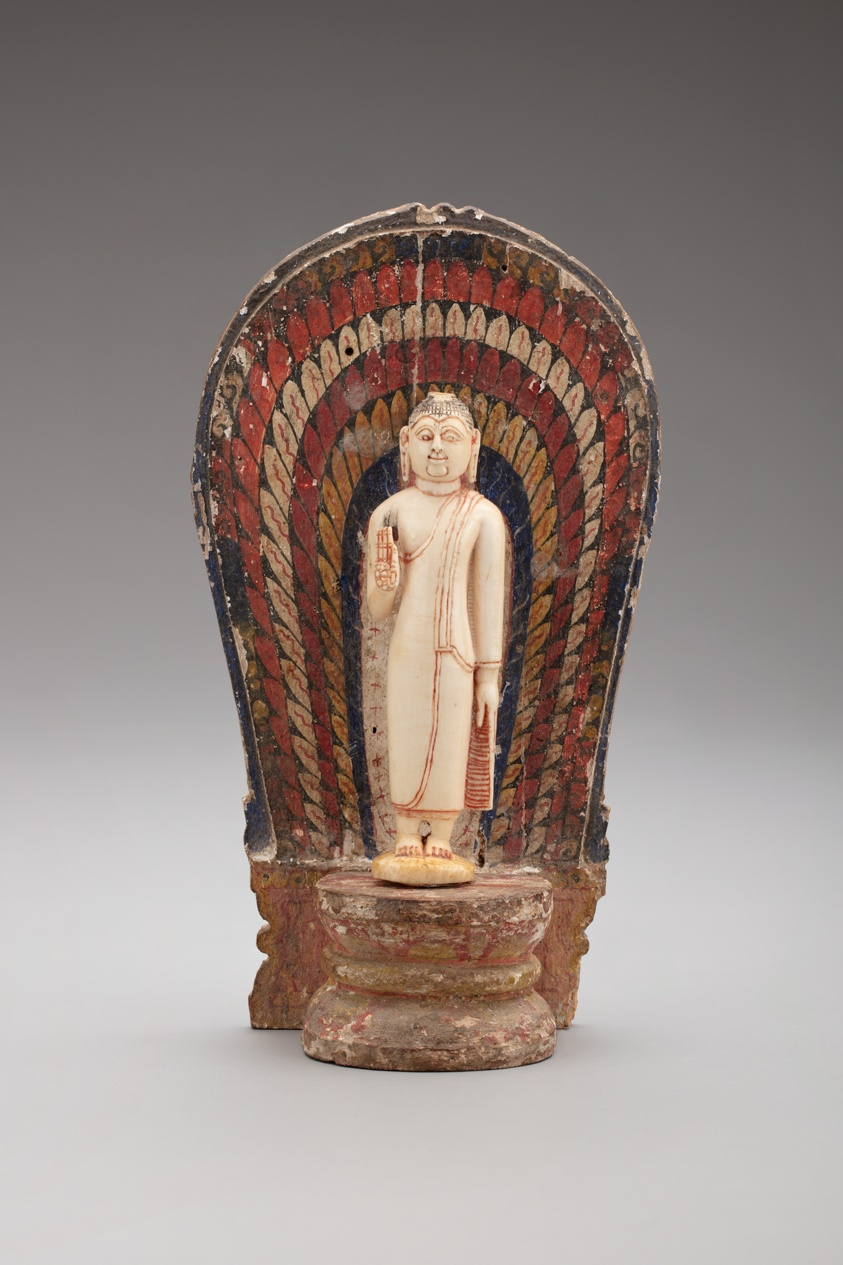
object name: Sculpture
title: Buddha Standing with Hand in the Gesture of Reassurance (Abhayamudra) with Radiating Nimbus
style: South Asian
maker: Sri Lanka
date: Kandyan period (1480–1815)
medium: Ivory, wood, and pigments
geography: Sri Lanka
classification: ivory; sculpture; asian art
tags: Buddha